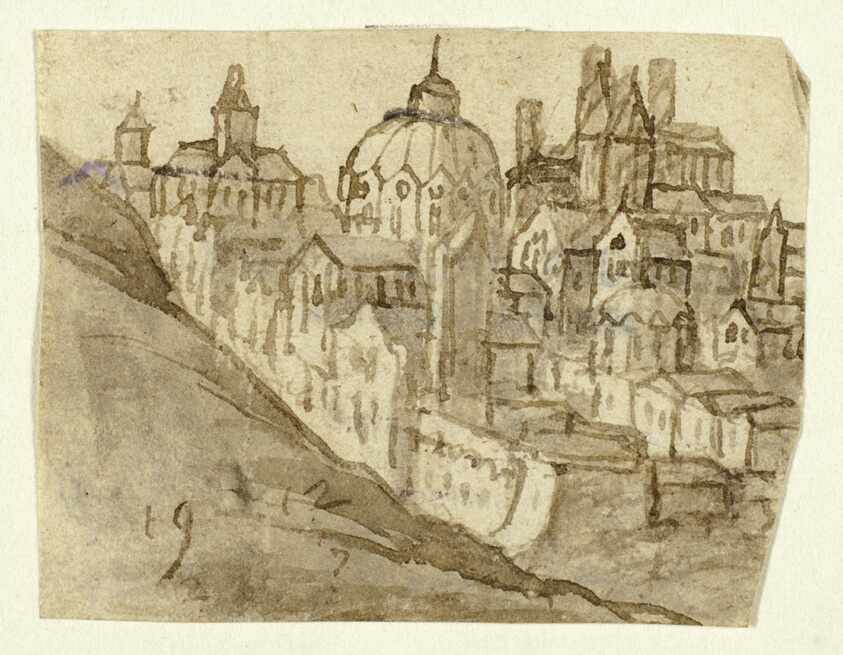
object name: Drawing and Watercolor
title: Citadel with Dome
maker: Unknown Artist; Flemish, 17th century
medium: Pen and brown ink, and brush and brown wash, on cream laid paper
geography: Flanders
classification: pen and ink drawings; drawings (visual works); prints and drawing